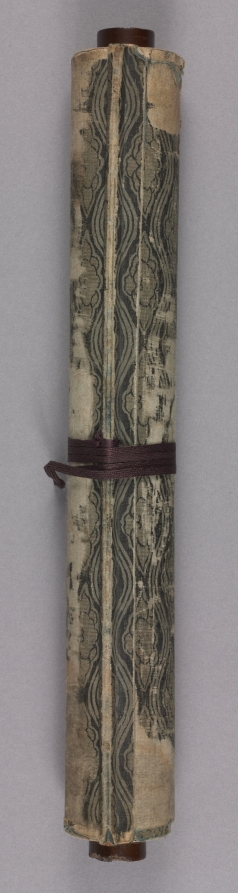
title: Chinese Seals and Poets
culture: Japan, Edo period (1615–1868)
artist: Hosokawa Rinkoku (Japanese, 1779–1843)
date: 1842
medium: handscroll; ink and color on paper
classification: Painting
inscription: Eight seal impressions are painted in red and alternate with sketchily painted figures. Artist's colophon at end of scroll.